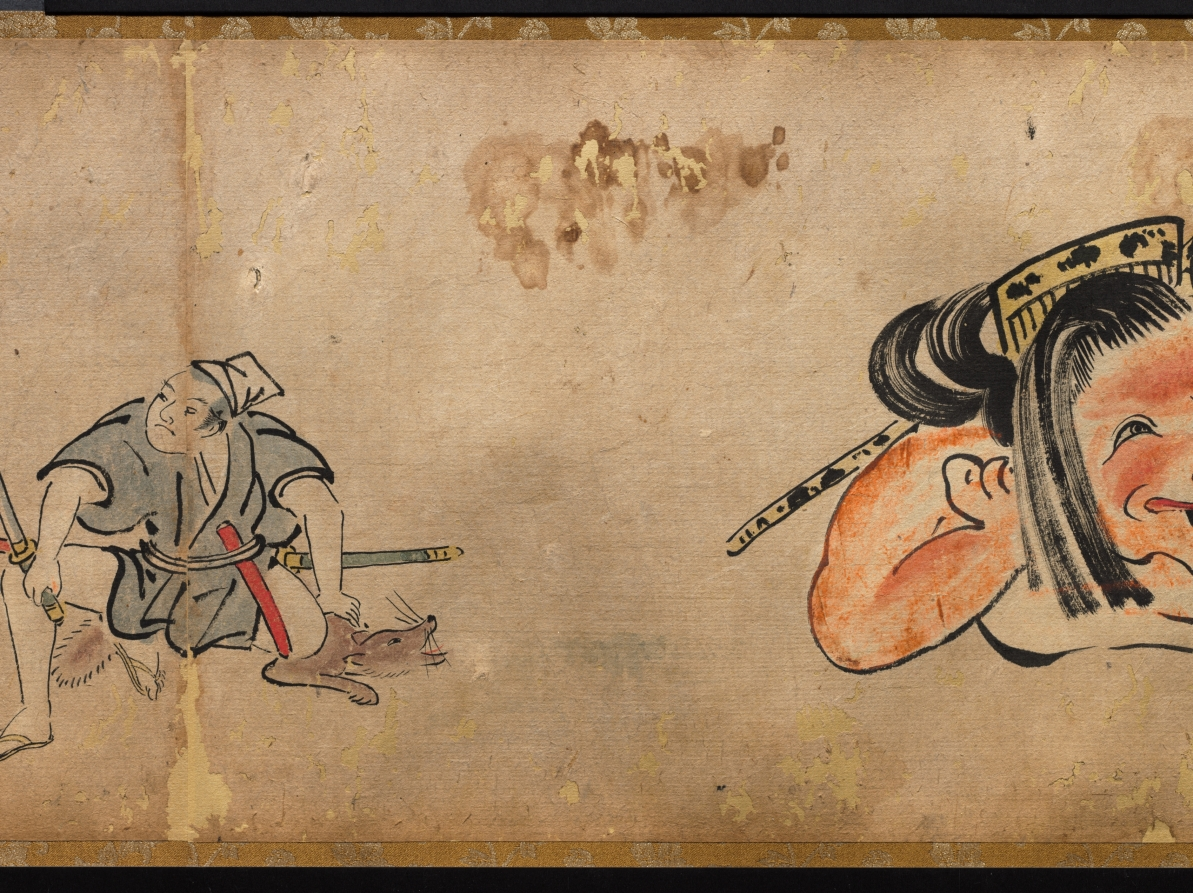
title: The Illustrated Tale of Oishi Hyōroku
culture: Japan, Edo period (1615–1868)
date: 1700s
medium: handscroll; ink and color on paper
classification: Painting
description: This incomplete handscroll illustrates part of the story of Oishi Hyoroku, a young man tasked with battling fox apparitions who were creating problems in his town. In other extant versions of the scroll, the story is set in the fall of 1624 in Kagoshima in southern Japan. Throughout the story, Hyoroku is tricked and terrified by the foxes that shift their shapes into a variety of monstrous phantoms. After repeated humiliations, he eventually captures two of the foxes. In this version, colloquial texts that function like text blurbs in comics appear throughout the scroll, but the main text is missing.